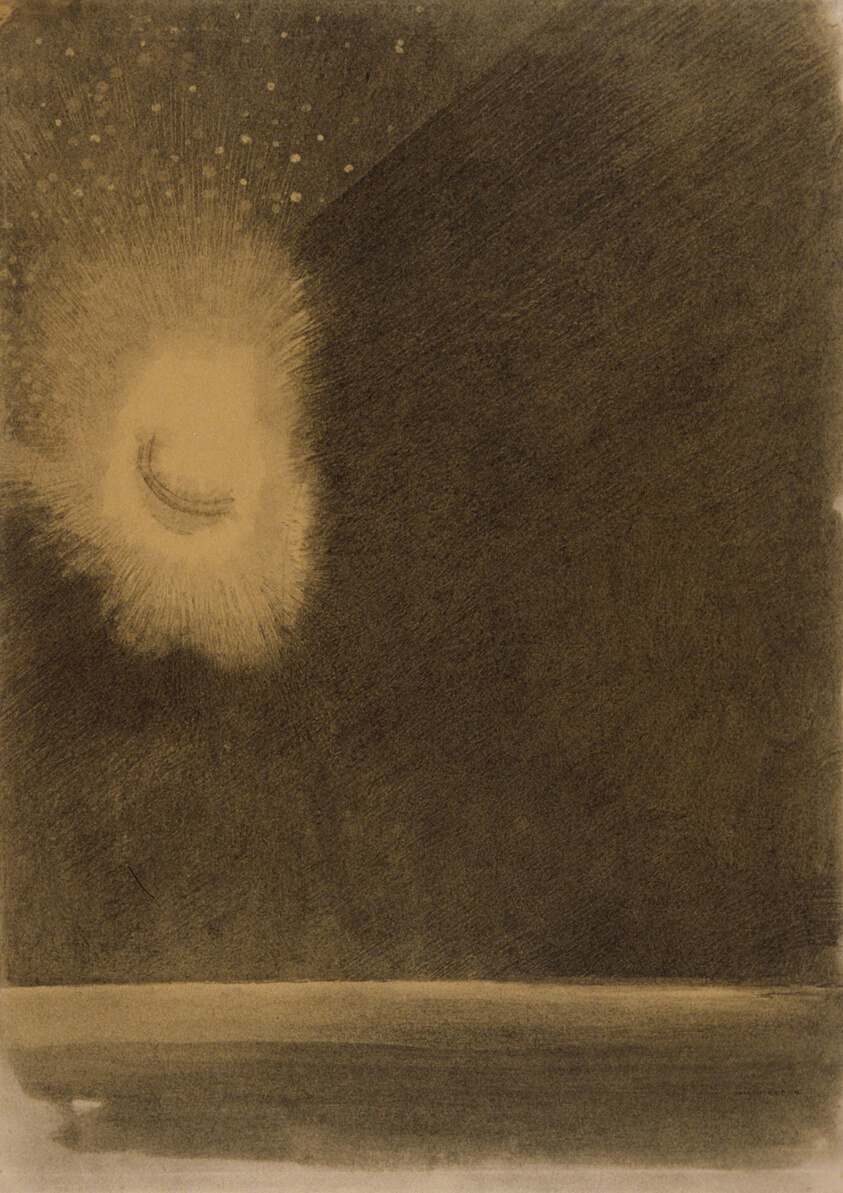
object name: Drawing and Watercolor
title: Le Nebuleuse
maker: Odilon Redon (French, 1840-1916)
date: 1875/80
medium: Two types of charcoal with stumping, scraping, erasing and burnishing, on ivory wove paper (discolored to cream)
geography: France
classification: charcoal; drawings (visual works); prints and drawing; paper